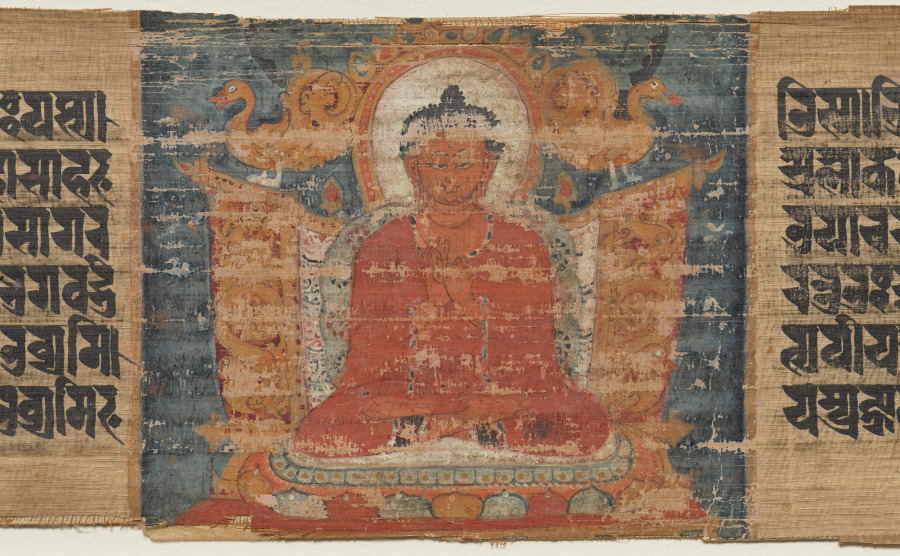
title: Preaching Amitabha with Avalokiteshvara and Manjushri, folio 186 (verso), from a Manuscript of the Perfection of Wisdom in Eight Thousand Lines (Ashtasahasrika Prajnaparamita-sutra)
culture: Eastern India, Bihar, Vikramashila Monastery. Painting: Nepal, Kathmandu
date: Sunday, September 14, 1119 (year 239 of the Newar Samvat in the month of Ashvina)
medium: Gum tempera and ink on palm leaf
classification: Painting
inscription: [gaṅgānadīvā]lukopameṣu trisāhasramahāsāhasreṣu lokadhātuṣu gaṅgānadīvālukopamān buddhān bhagavataḥ paśyati sma bhikṣusaṃghaparivṛtān bodhisattvaguṇapuraskṛtān etaireva nayairebhireva nāmabhiretairevākṣarairimāmeva prajñāpāramitāṃ bhāṣamāṇān / tadyathāpi nāma ahametarhi asminneva trisāhasramahāsāhasre lokadhātau dharmaṃ deśayāmi bhikṣusaṃghaparivṛto bodhisattvagaṇapuraskṛtaḥ, ebhireva nayairebhireva nāmabhirebhirevākṣarairimāmeva prajñāpāramitāṃ bhāṣe / so 'cintyena bāhuśrutyena śrutasāgaratayā ca samanvāgato 'bhūt, sarvāsu ca jātiṣu na jātu buddhavirahito 'bhūt / yatra yatra buddhā bhagavantaḥ saṃmukhībhūtā bhavanti, tatra tatropapadyate sma / avirahitaś ca bhavati sma buddhairbhagavadbhiḥ, antataḥ svapnāntaragato 'pi / sarve ca anena akṣaṇā vivarjitāḥ, kṣaṇasaṃpaccārāgitā // tatra khalu punarbhagavānāyuṣmantamānandamāmantrayate sma - tadanenāpi te ānanda paryāyeṇa evaṃ veditavyam - ityapīyaṃ prajñāpāramitā bodhisattvānāṃ mahāsattvānāṃ sarvajñajñānasyāhāriketi / tasmāttarhi ānanda bodhisattvairmahāsattvaiḥ sarvajñajñānaṃ pratilabdhukāmairasyāṃ prajñāpāramitāyāṃ caritavyam / iyaṃ prajñāpāramitā śrotavyā udgrahītavyā dhārayitavyā vācayitavyā paryavāptavyā pravartayita[vyā]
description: The red Buddha Amitabha is seated under a tree on a throne in the middle of the upper page; two geese—his animal emblems—perch at the top on either side. A white and red bodhisattva are on either side. This manuscript, consisting of 188 double-sided folios, was calligraphed by a scribe at a monastery in northeastern India, commissioned by a monk from Nepal. Judging from the style of the paintings, they are the work of Nepalese artists.